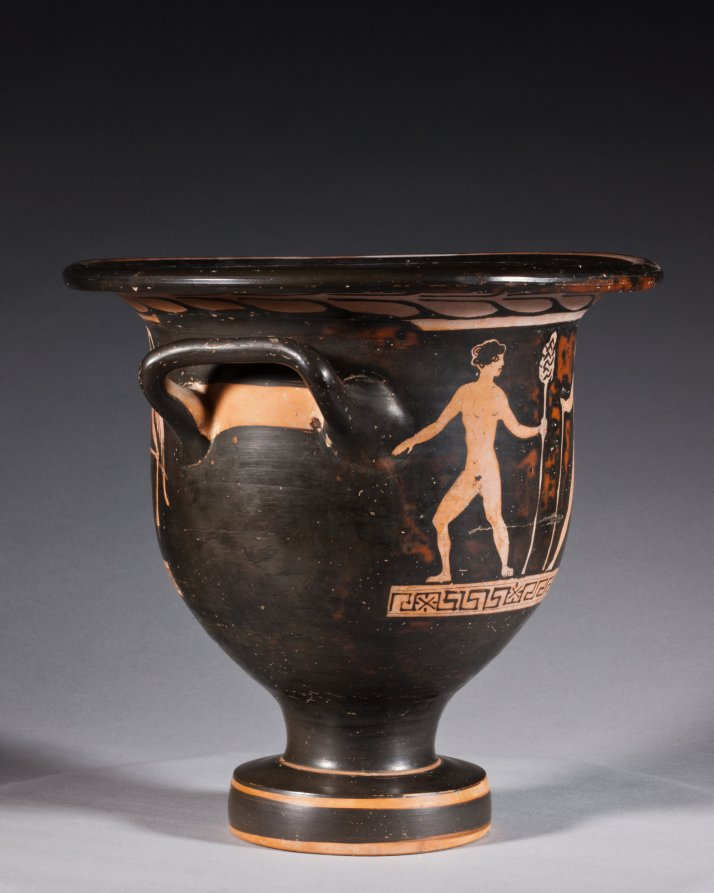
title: Red-Figure Bell Krater (Mixing Vessel): Aphrodite and Eros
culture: South Italian, Apulian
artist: attributed to Graz Painter (South Italian, Apulian, active c. 380–360 BCE)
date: c. 370–360 BCE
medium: ceramic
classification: Ceramic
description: This small mixing vessel shows a finely dressed woman seated on a chest and holding up a mirror to admire herself. Before her stands Eros, the winged god of love, holding a ribbon or sash. Behind the woman stands a pillar with the inscription ΑΦΡΟΔΙΤΗ, or APHRODITE, the goddess of love. Such labels are rare on vases, and scholars debate whether this names the woman shown as Aphrodite herself, with her son Eros, or a bride envisioning herself as Aphrodite, just before her wedding.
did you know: The dancing nude youths on the reverse are unusual; typically they would be standing and draped.